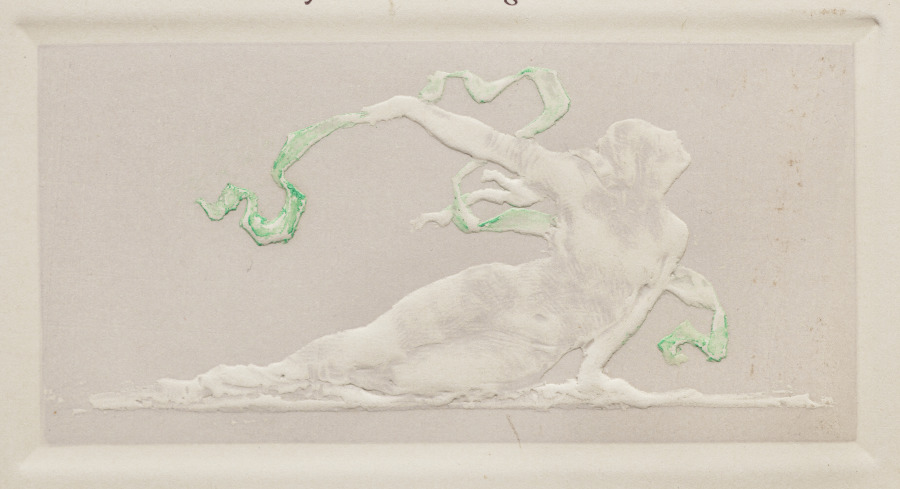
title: Dancing Woman in Reclining Pose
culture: France, early 20th Century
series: La Loïe Fuller, by Roger Marx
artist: Pierre Roche (French, 1855–1922)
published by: Les Cents Bibliophiles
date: 1904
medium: gypsograph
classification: Bound Volume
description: Although best known as a sculptor, Roche was a versatile and prolific artist who worked in many mediums. Loïe Fuller, the pioneer of modern dance who took Paris by storm in 1892, was one of his favorite subjects. He portrayed her in clay, bronze, marble, plaster, and in a series of gypsographs that illustrated an essay by the art critic Roger Marx. The book was described as "a precious monument to Loïe Fuller."